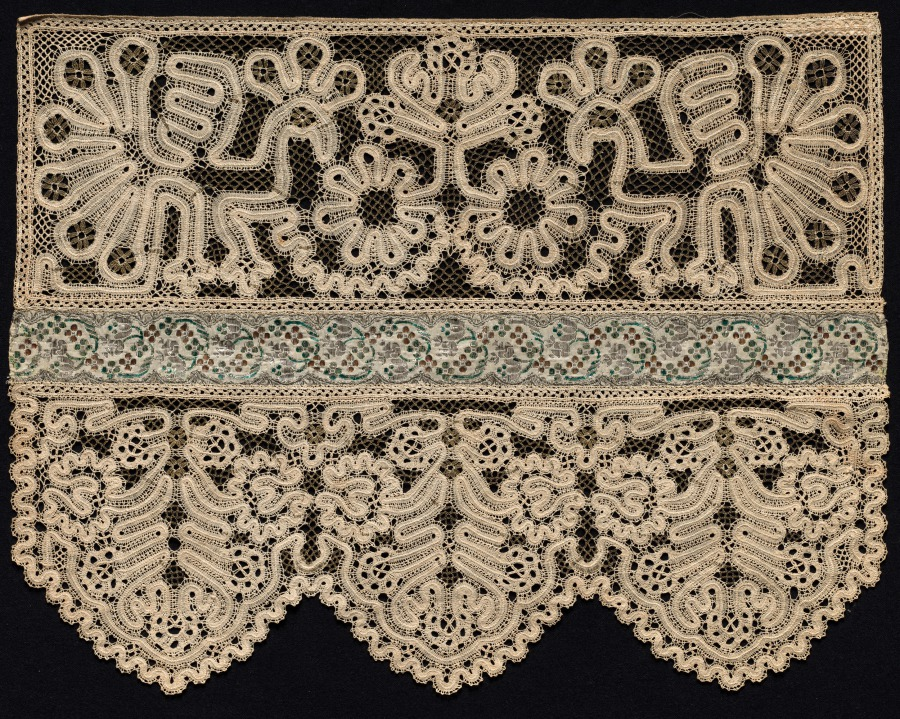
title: Lace Towel End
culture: Russia, Nizhny-Novgorod province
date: c. 1700s–1800s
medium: cotton or linen (est.) straight (continuous) bobbin lace (Vologda tape lace). The tape forms figural or plant motifs outlined with gimp (heavy cord) with a monochrome plaited ground (metal thread or linen (est.) linking the tape; applied silk (est.) and metal thread ribbon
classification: Lace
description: This Russian lace panel was likely used to embellish the end of a bathing towel. Textiles of this type are valuable for their fine embroidery or lacemaking that included ancient folk motifs, ritual significance, exemplification of the role of textiles in their society, and in this case, connection to a prominent woman collector, Natalia de Shabelsky, without whom this textile and others like it might have been lost.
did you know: Embellishing the ends of everyday towels was a common folk tradition in many cultures because it displayed the skill of the mother or daughter who stitched them.